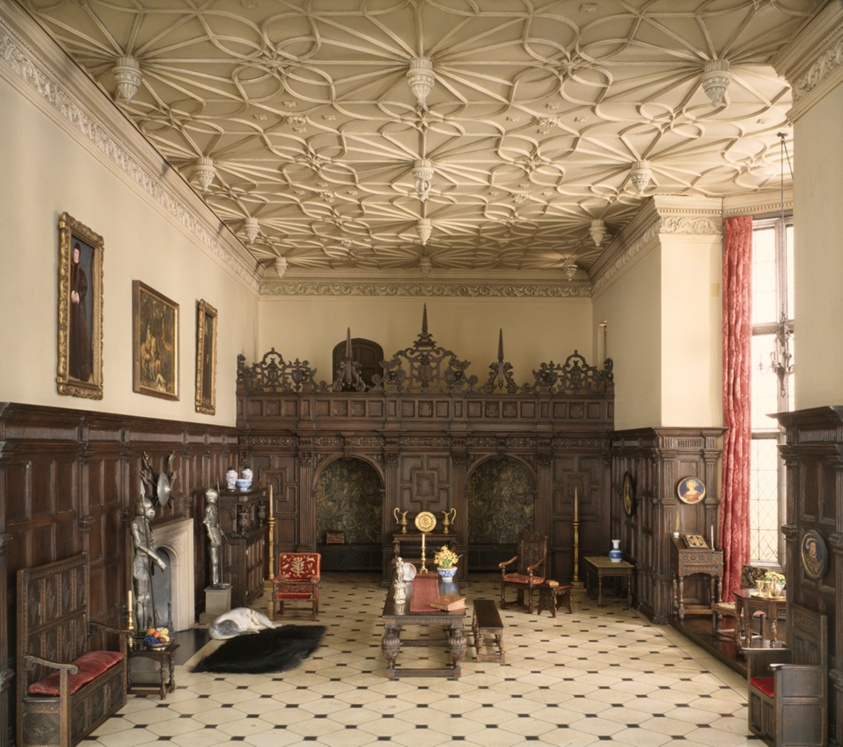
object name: Miniature room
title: E-1: English Great Room of the Late Tudor Period, 1550-1603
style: tudor, european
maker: Designed by Narcissa Niblack Thorne; American, 1882-1966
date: c. 1937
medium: Miniature room, mixed media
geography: United States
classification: miniature; thorne rooms